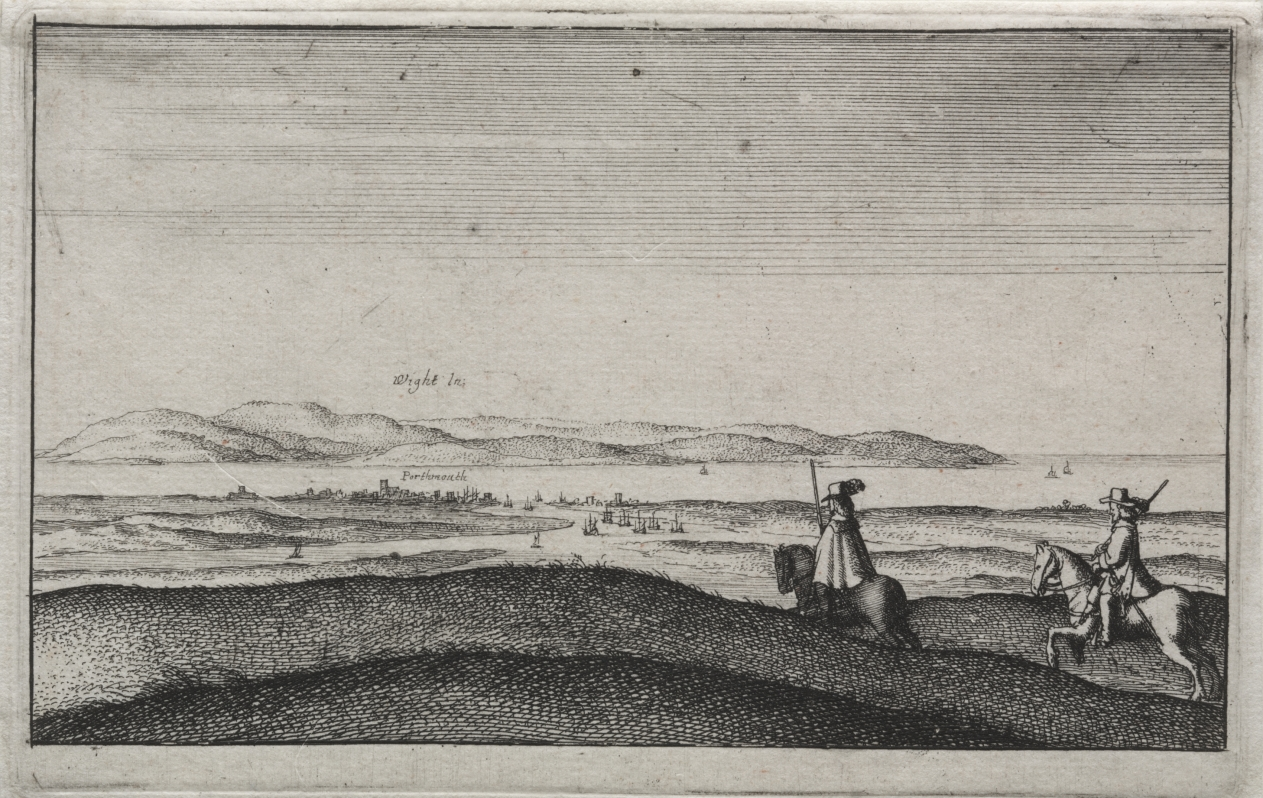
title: English Views: Isle of Wight from Portsmouth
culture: Bohemia, 17th century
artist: Wenceslaus Hollar (Bohemian, 1607–1677)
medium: etching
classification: Print